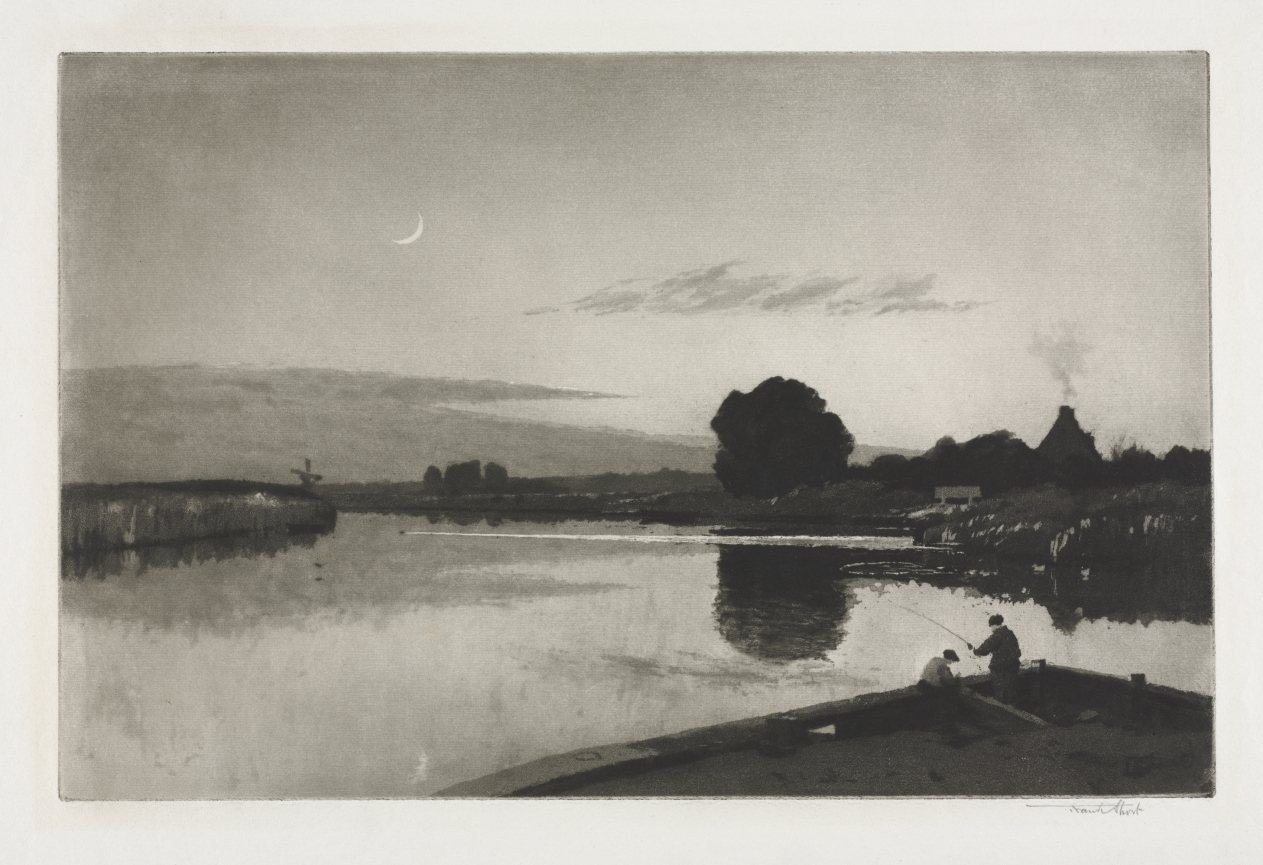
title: The New Moon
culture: England, 20th century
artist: Frank Short (British, 1857–1945)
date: 1918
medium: aquatint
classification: Print